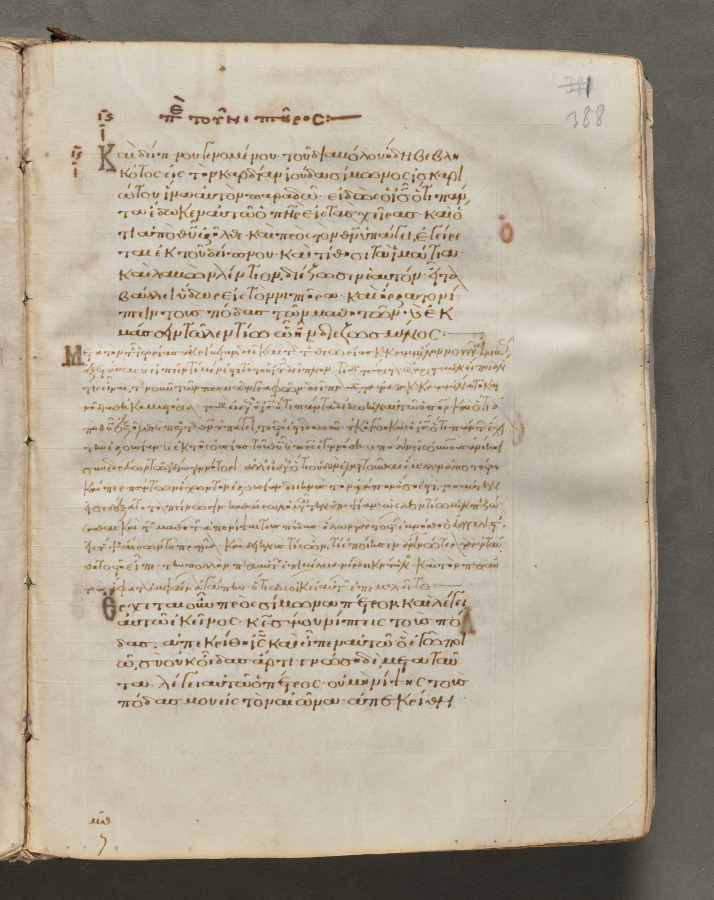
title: Text, folio 388 (recto), from a Gospel Book with Commentaries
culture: Byzantium, Constantinople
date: c. 1000–1100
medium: ink, tempera, and gold on vellum; leather binding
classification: Bound Volume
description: Each of the four gospels in this book opens on a page with brilliantly illuminated borders depicting the author of the text as well as birds—principally peacocks, symbols of the immortality of the soul—and fountains, representing the fountain of life and the salvation of the soul. This volume consists of 428 leaves with texts in Greek. Its level of sophistication suggests that it was probably written and decorated in a monastery in Constantinople.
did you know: Gospel books were carried in procession through Byzantine churches.